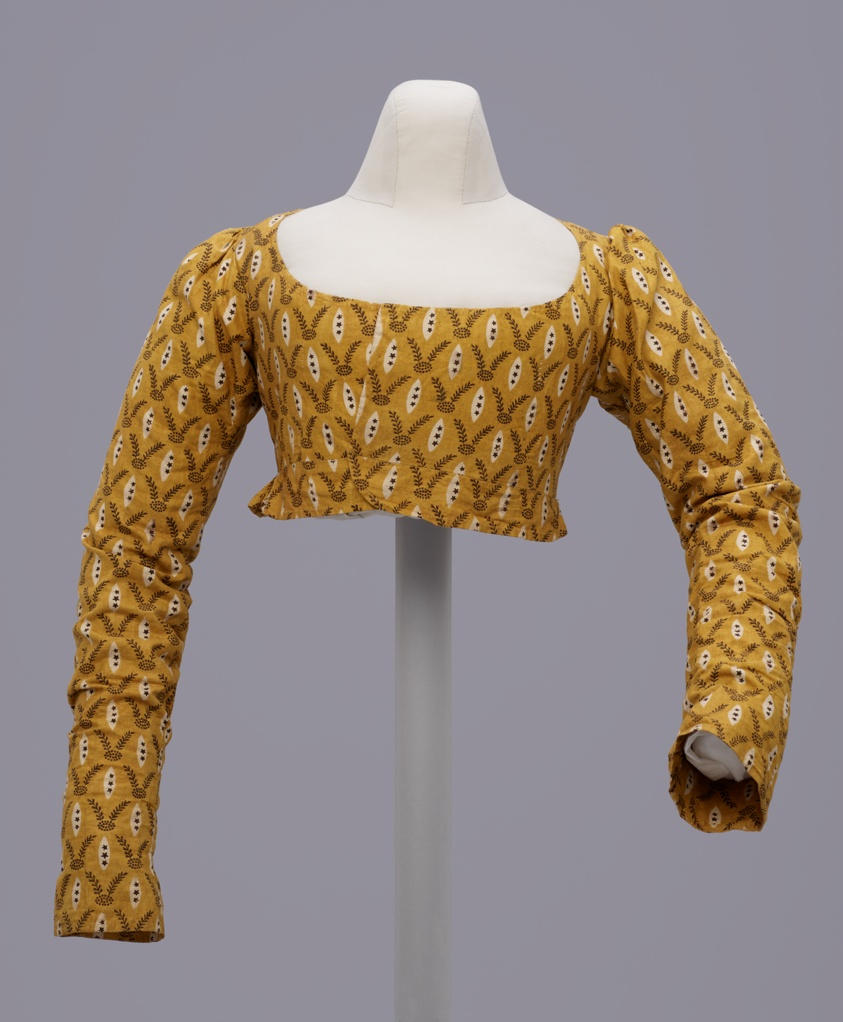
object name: Costume and Accessories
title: Woman's Spencer jacket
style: 17th Century, 18th Century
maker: France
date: c. 1800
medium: Cotton, plain weave, hand-block printed; cotton lining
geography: France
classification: dress (garment); costume - printed; costume - weaving; clothing; garment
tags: lattices, floral, stars, clothing